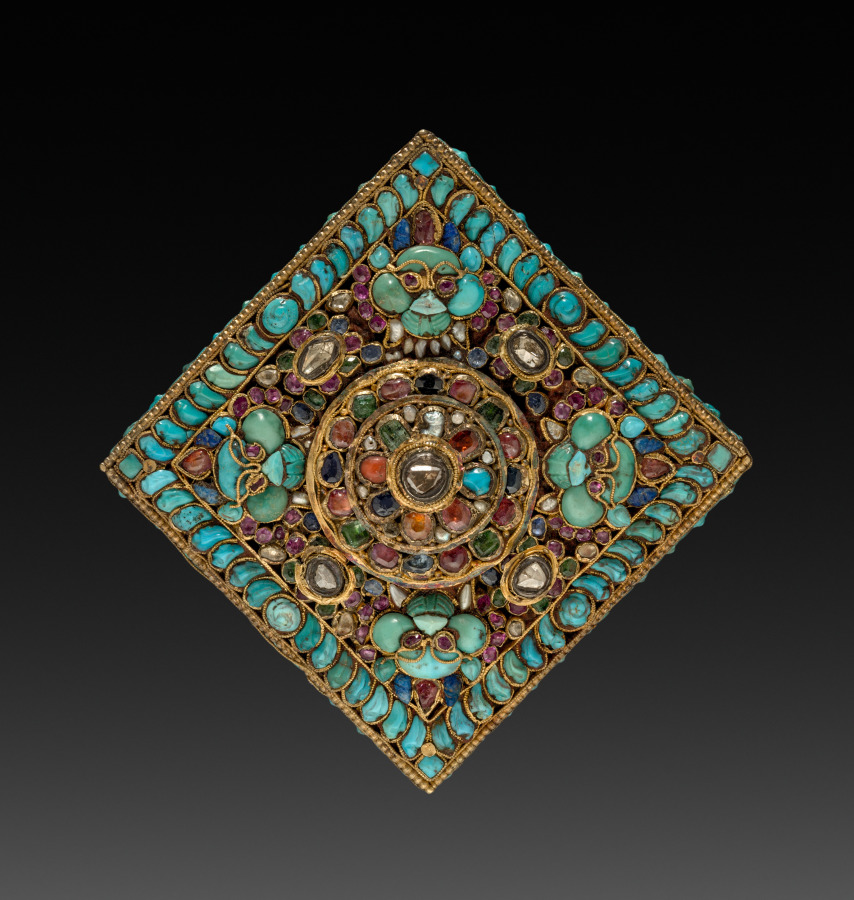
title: Charm Case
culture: Tibet, 19th century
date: 1800s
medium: gold with jewels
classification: Jewelry